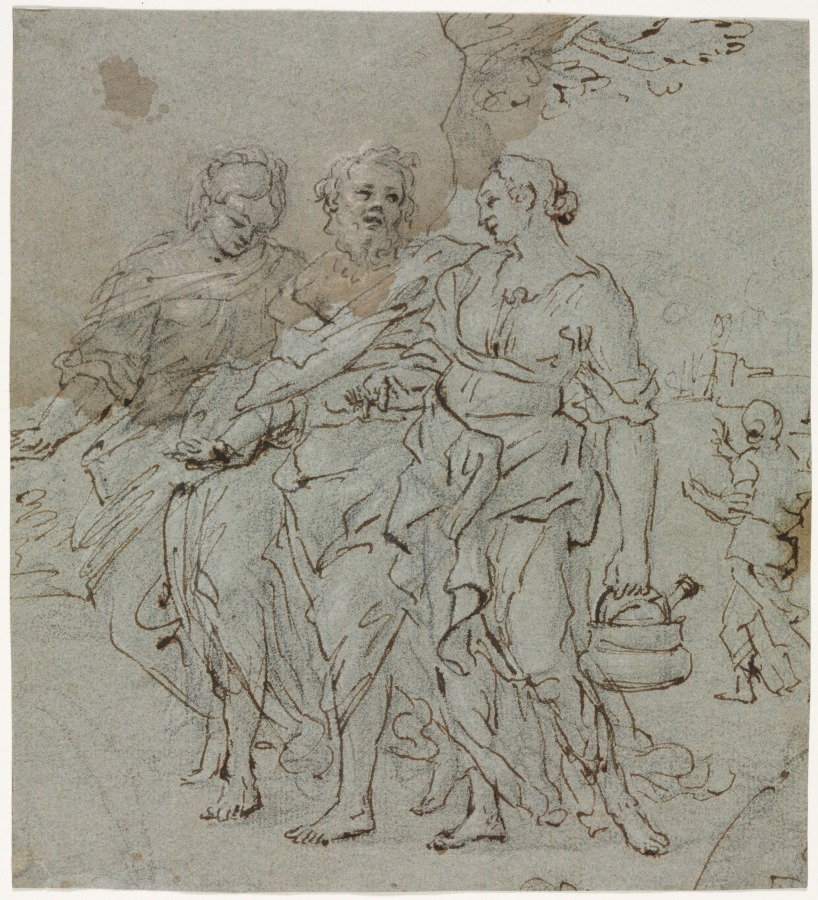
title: Lot and His Daughters (recto); Sketch for Lot and His Daughters (verso)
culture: Italy, 17th century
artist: circle of Pietro da Cortona (Italian, 1596–1669)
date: 1600s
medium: pen and brown ink over black chalk(?), heightened with traces of white gouache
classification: Drawing